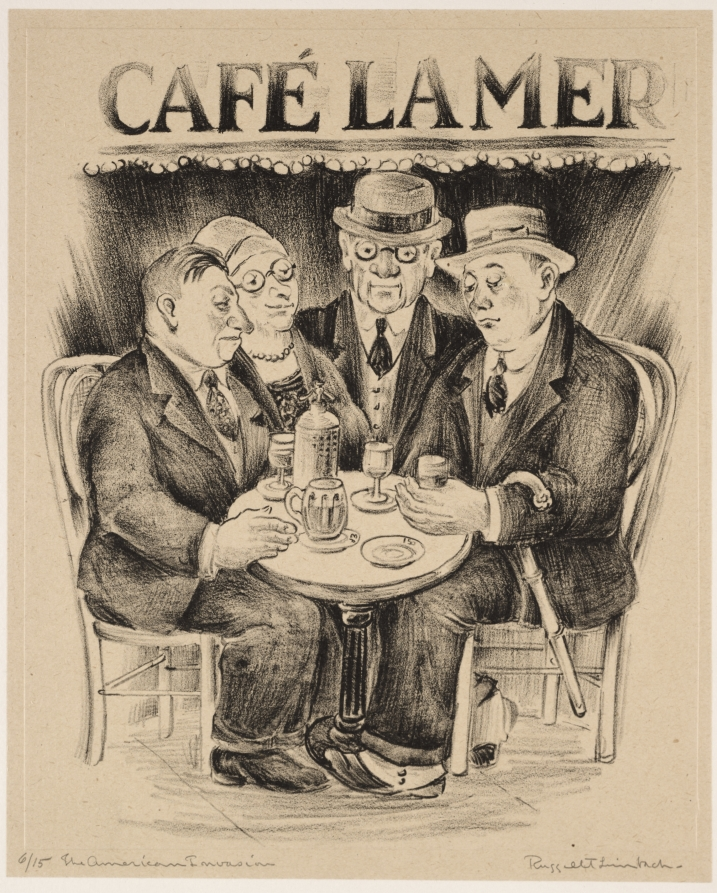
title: The American Invasion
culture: America, Ohio, Cleveland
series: 29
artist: Russell T. Limbach (American, 1904–1971)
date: c. 1929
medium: lithograph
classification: Print